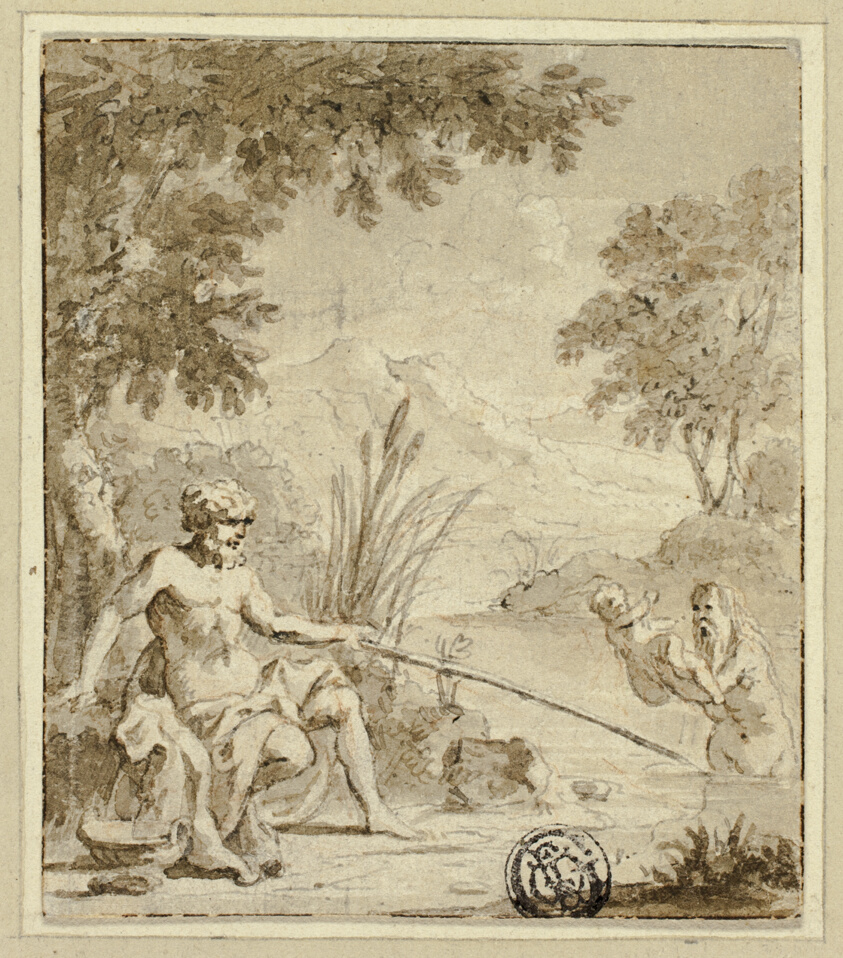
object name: Drawing and Watercolor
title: Mythological Birth of a God or Demi-God from a River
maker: Jan Goeree (Dutch, 1670-1731)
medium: Pen and brown ink, with brush and brown wash, over traces of red chalk, on ivory laid paper, tipped onto cream wove paper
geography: Holland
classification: ink or chalk wash; drawings (visual works); prints and drawing